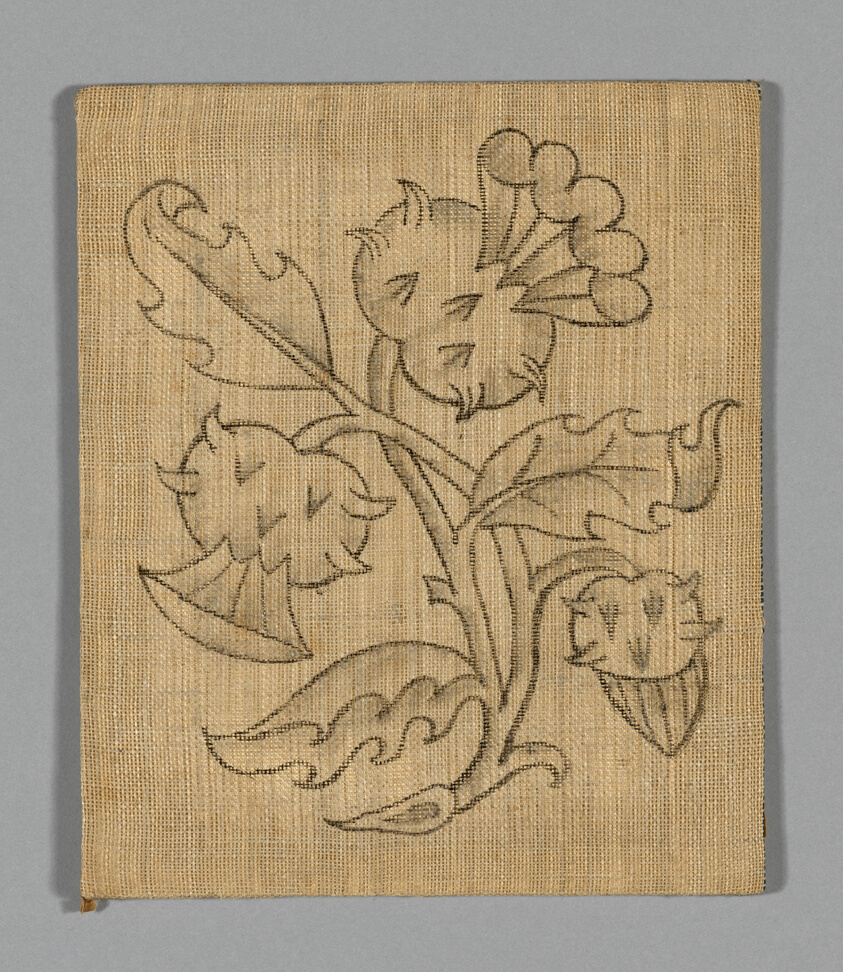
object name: Textile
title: Needlework Pattern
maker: England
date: 17th century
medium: Linen, plain weave with pencil and pen drawn floral design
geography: England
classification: textile; patterns (guides); accessories (object genre); needlework (visual works)